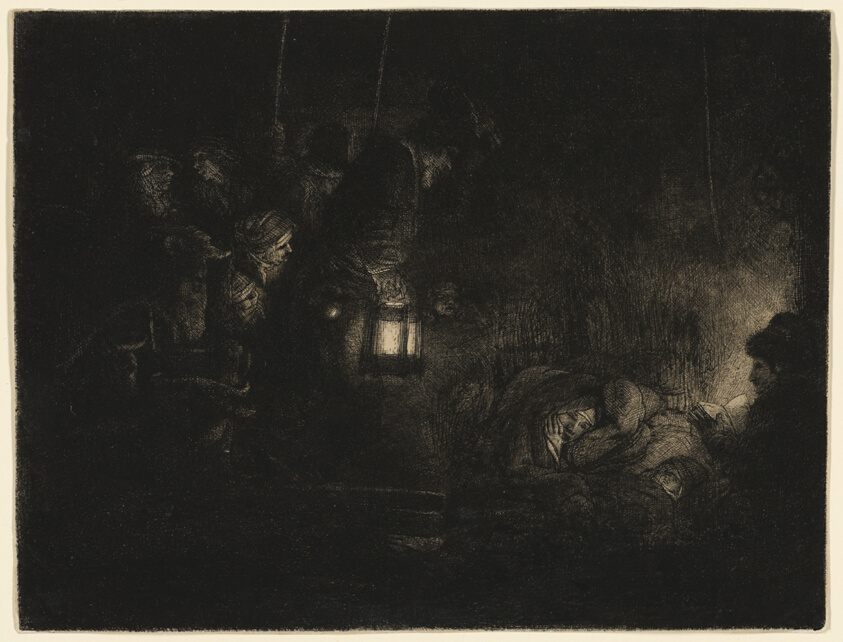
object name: Print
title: The Adoration of the Shepherds: A Night Piece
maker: Rembrandt van Rijn (Dutch, 1606-1669)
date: c. 1657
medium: Etching, drypoint, and burin in black on ivory laid paper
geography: Holland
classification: etching; print; prints and drawing; paper; drypoint; burin